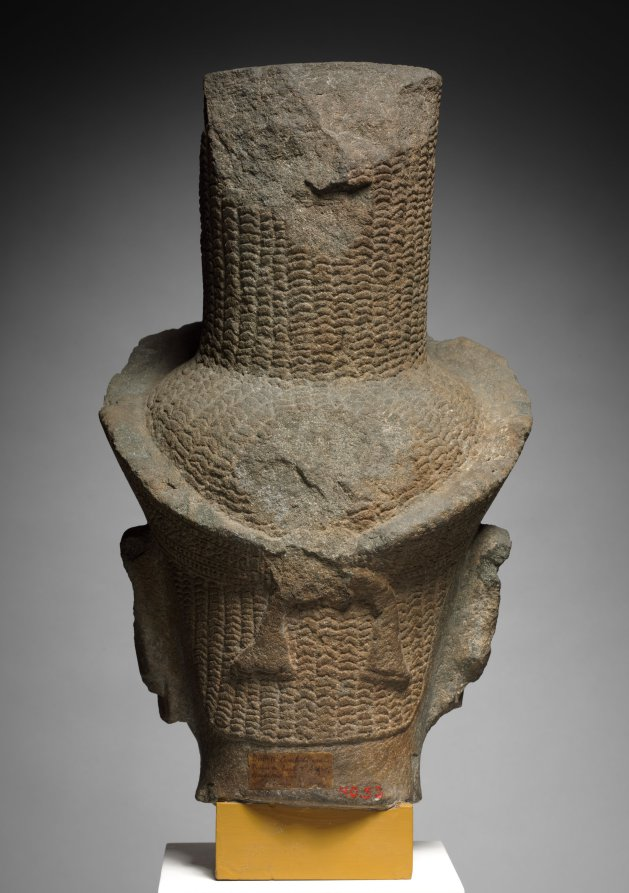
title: Head of Shiva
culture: Cambodia, Angkor, 12th century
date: 1100s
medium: sandstone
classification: Sculpture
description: Khmer patrons and artists produced works of art that could depict either a deified king or a god who has royal attributes. The Khmer cult of the god-king allowed for such fluidity of interpretation. Presence of a third eye in the forehead and matted locks of hair are attributes both of the Hindu god Shiva and the followers who emulated him in order to get closer to him.